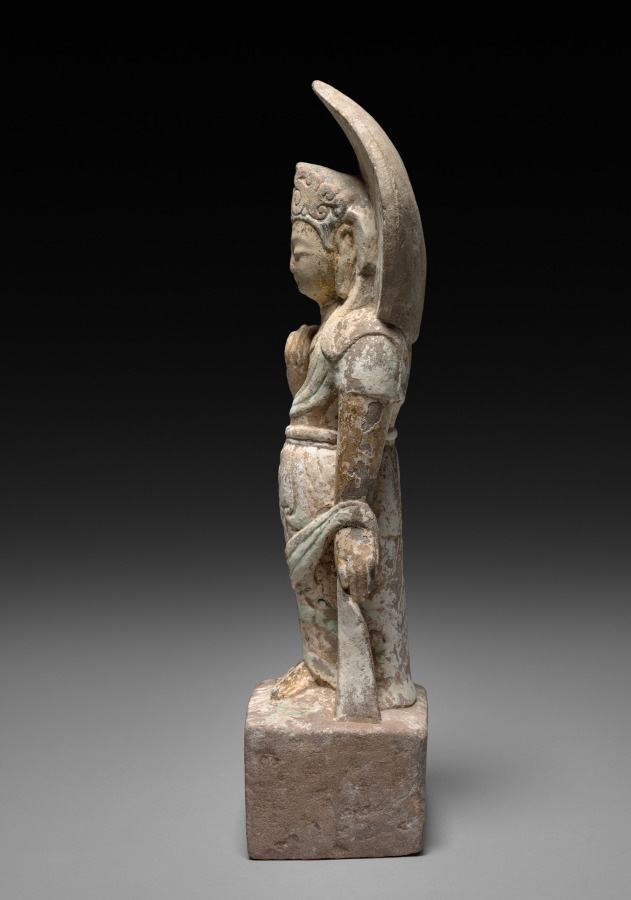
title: Bodhisattva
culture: China, Sui dynasty (581-618) - Tang dynasty (618-907)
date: late 500s–early 600s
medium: stone with polychromy and gilding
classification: Sculpture